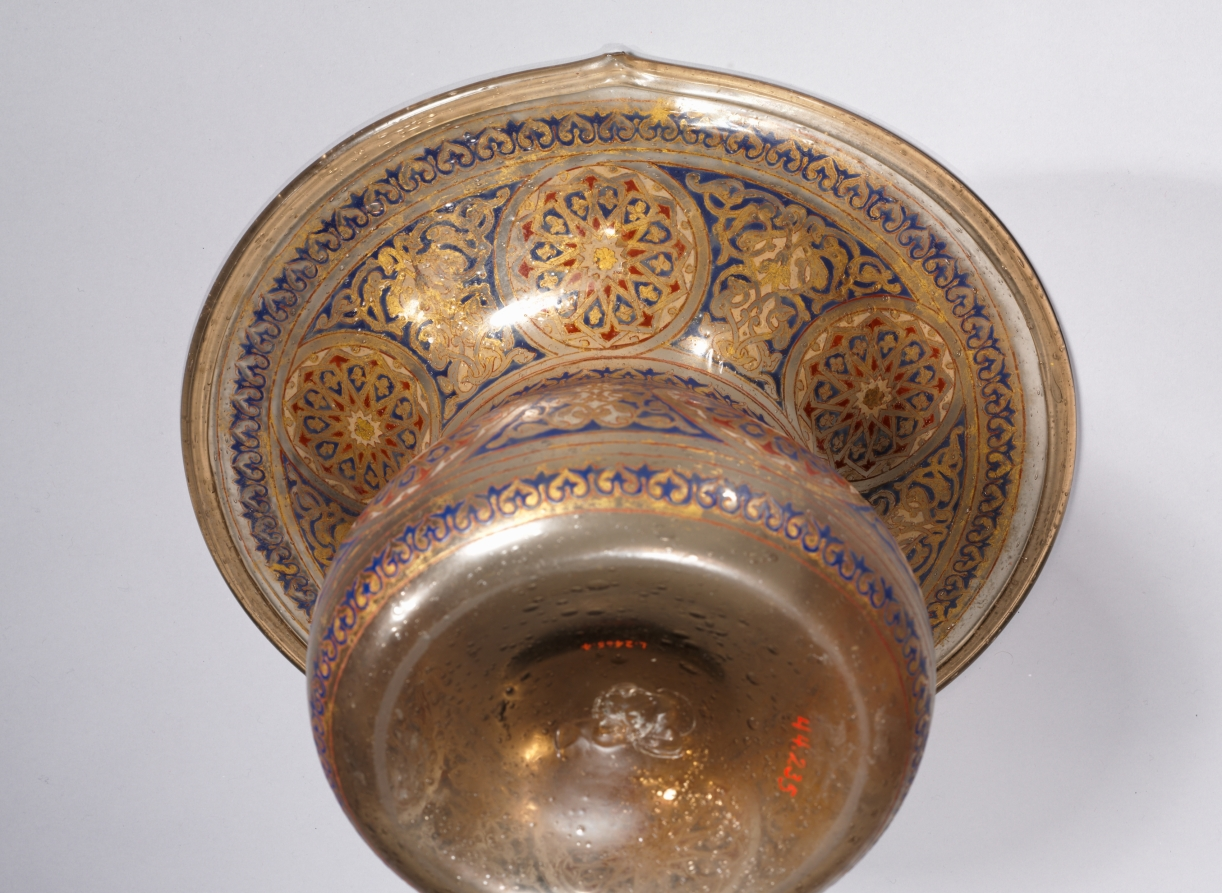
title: Ceremonial Spittoon or Basin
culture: Europe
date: late 1800s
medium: glass with enameled and gilded decoration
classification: Glass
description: This basin, as with the mosque lamp CMA 1981.10, is representative of reproductions of Mamluk glass that were prominent in the late 1800s in Europe during a period of resurgence of interest in Islamic art. At this time, collectors and artists revived the techniques of enameling and gilding that are hallmarks of Mamluk glass.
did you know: The intense enamel colors form striking star and leaf patterns.